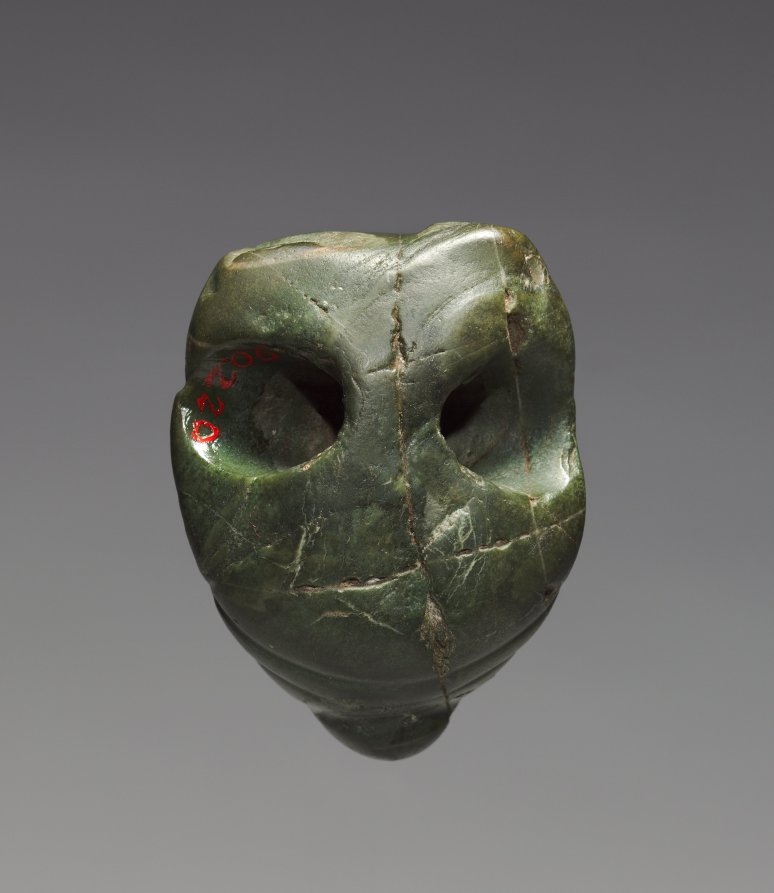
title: Head with Animal Headdress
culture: Mexico, Puebla, Matamoros region(?), Olmec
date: 900–300 BCE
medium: serpentine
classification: Sculpture